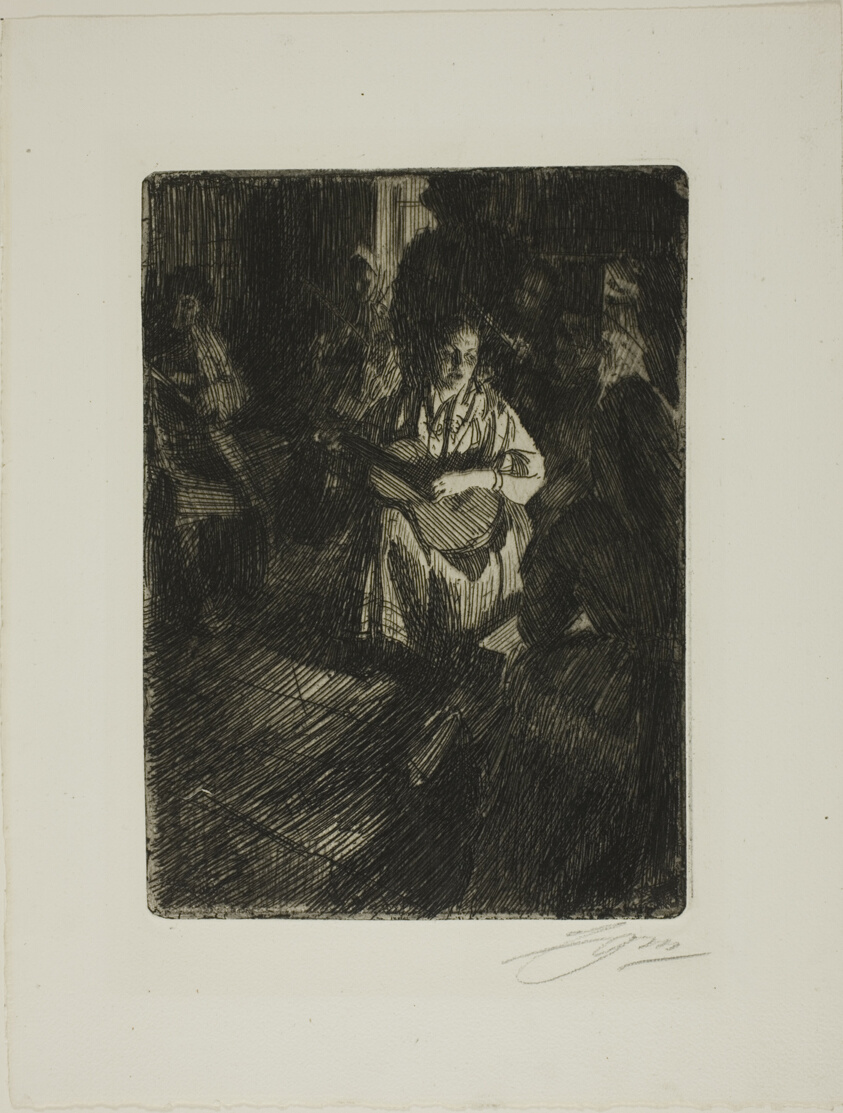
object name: Print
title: Musique en Famille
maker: Anders Zorn (Swedish, 1860-1920)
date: 1905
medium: Etching on ivory laid paper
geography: Sweden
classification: etching; print; prints and drawing